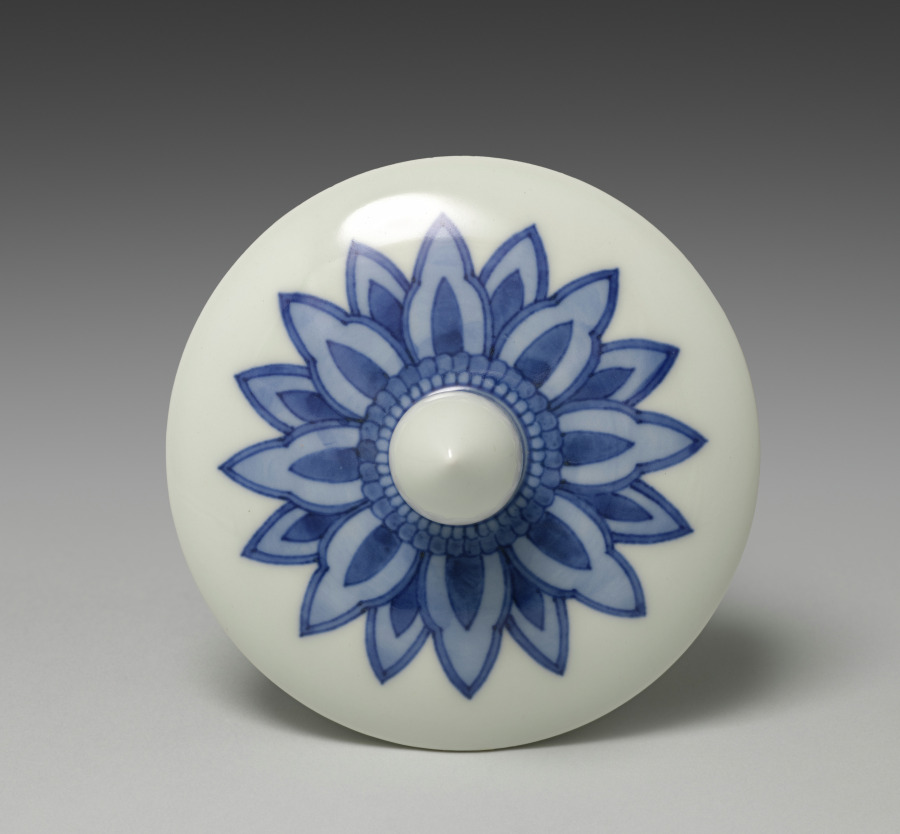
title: Lid for a Jar with Peonies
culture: Japan, Meiji period (1868–1912)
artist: Seifū Yohei III (Japanese, 1851–1914)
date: 1897–1912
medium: Porcelain with underglaze blue, overglaze color enamel, molded decoration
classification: Ceramic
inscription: 大日本清風造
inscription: 金聲玉振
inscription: 帝室技芸員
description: One of Seifū Yohei III’s most visually impactful techniques, seen in this work, was to combine complex low-relief designs in clay surrounded by diffused underglaze blue or pink, which he then covered with a transparent or translucent glaze. Yohei III also experimented with clay bodies ranging from bluish white to ivory combined with translucent cream-colored glazes. The atmospheric effects he achieved were considered remarkable.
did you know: Seifū Yohei III (1851–1914) was a son of the Maruyama school painter Okada Ryōhei (dates unknown).